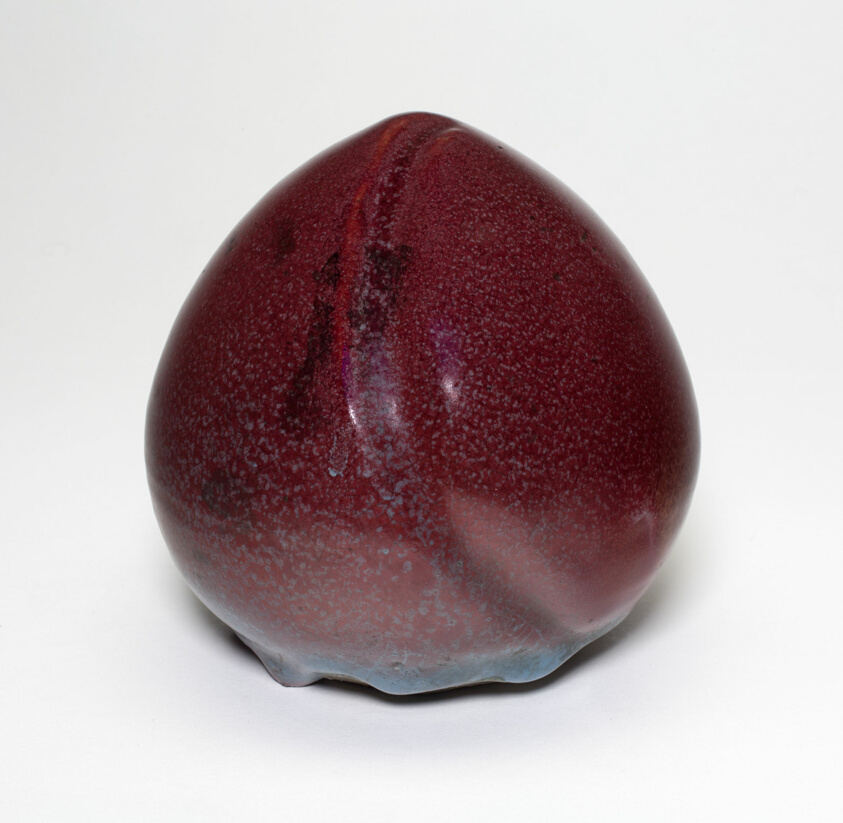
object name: Vessel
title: Peach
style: Chinese (culture or style)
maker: China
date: Ming dynasty (1368–1644)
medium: Jun ware; stoneware with purple and light blue glaze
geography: China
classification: ceramics; asian art; vessel